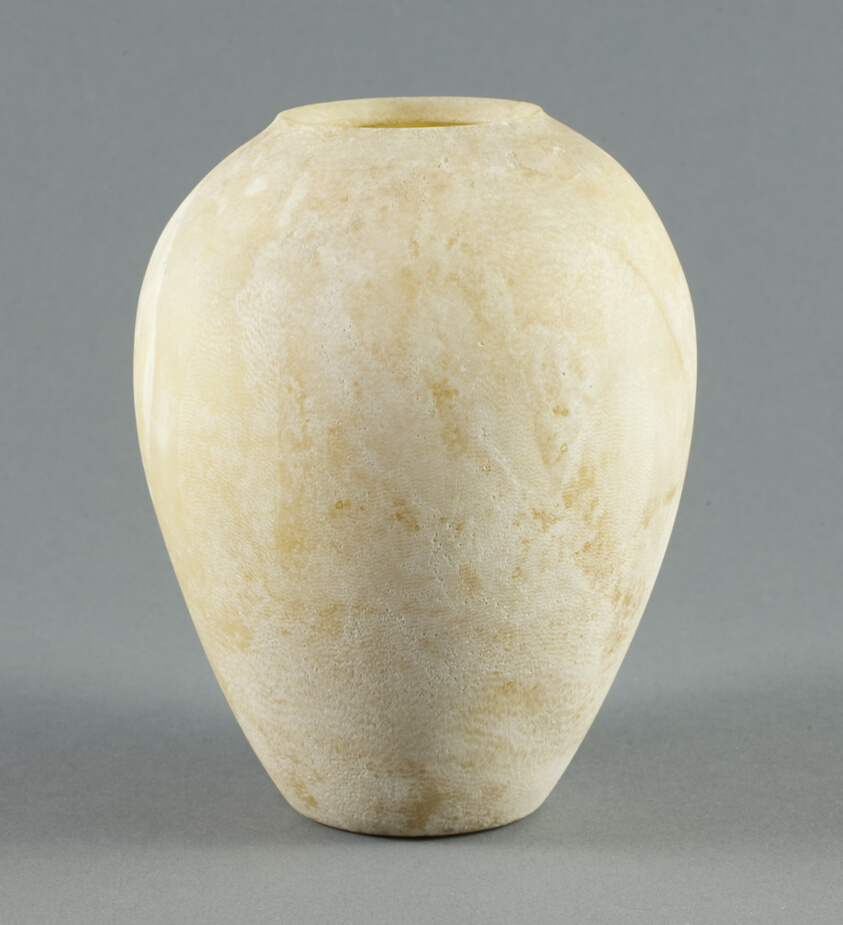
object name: Vessel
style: first dynasty, early dynastic (egyptian)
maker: Egyptian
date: Early Dynastic Period–Old Kingdom, Dynasty 1–6 (about 3000–2181 BCE)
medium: Travertine (Egyptian alabaster)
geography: Egypt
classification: vessel; stone; ancient art